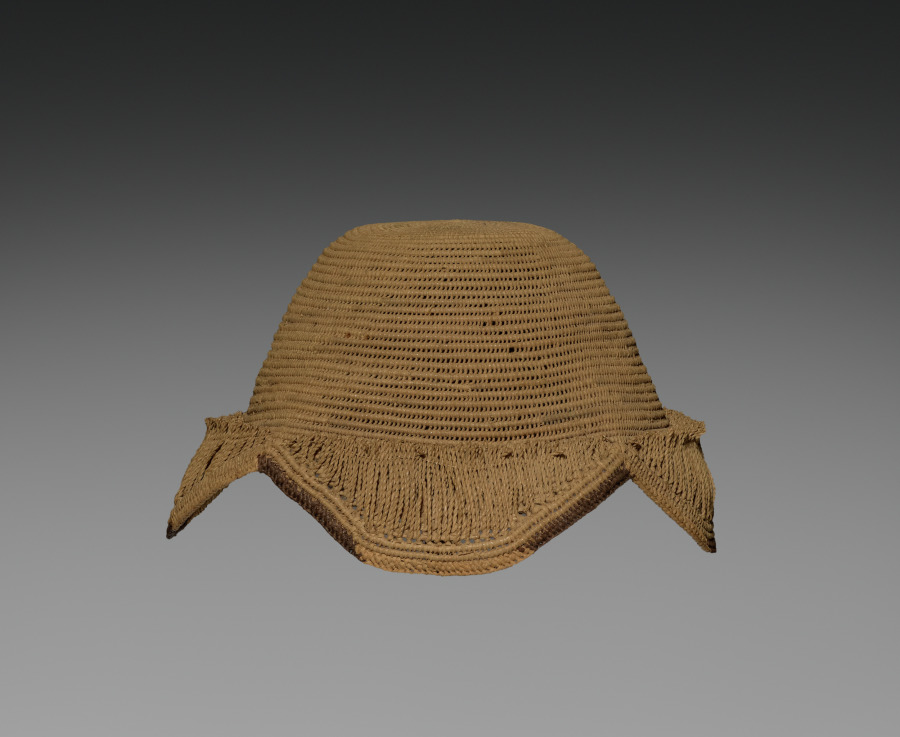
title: Hat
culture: Africa, Central Africa, Democratic Republic of the Congo, Kuba-style maker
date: early 1900s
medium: Raffia and dye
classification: Garment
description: Titled Kuba men and prominent women wear the laket, a small ornate dome-shaped hat. An essential fashion item of adult men in good social standing, it focuses special attention on the head as a significant marker of individual identity, ethnic affiliation, status, and role in society. This prestige object is secured on the crown of the head with a nine-and-a-half-inch metal pin that pierces through the hat onto a clump of hair. The laket is made from undyed raffia palm fiber that was then coiled into threads and woven. There are two examples of the laket: the plain type with the flat top, and the more elaborate type called the laket mishiing.